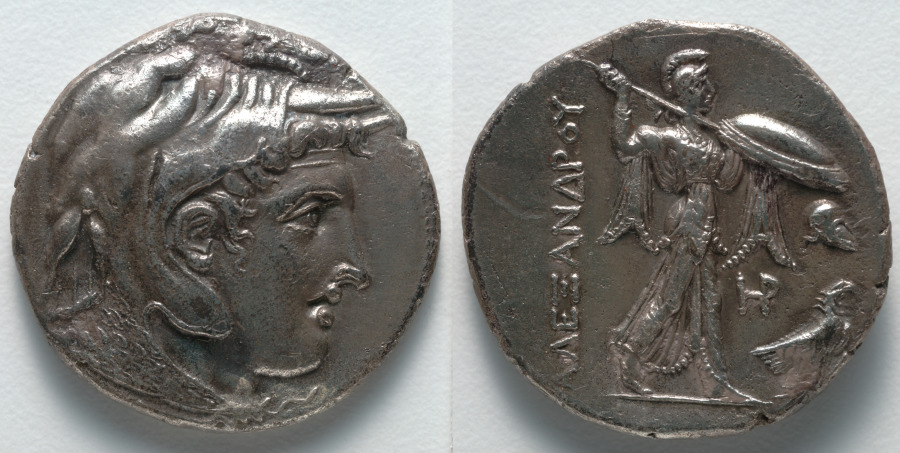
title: Tetradrachm: Head of Alexander III [The Great] (obverse); Athena (reverse)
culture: Egypt, Greco-Roman period (332 BCE–395 CE), reign of Ptolemy I (303–282 BCE), minted at Alexandria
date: 306 BCE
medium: silver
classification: Coins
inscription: ΑΛΕΞΑΝΔΡΟΥ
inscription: HP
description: Much like his former commander Alexander III (the Great) showed connections to Herakles and Zeus, Ptolemy I Soter (the Savior) used coins to validate his succession to power. Thus, in place of Herakles with lion-skin, this coin shows Alexander in an elephant headdress, referring to their shared Eastern triumphs. On the reverse is Athena Promachos, striding forward with shield and spear. Before her are a helmet and an eagle, and behind her the inscription ΑΛΕΞΑΝΔΡΟΥ, “of Alexander.”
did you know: The image of Alexander the Great in an elephant headdress references his Eastern conquests.